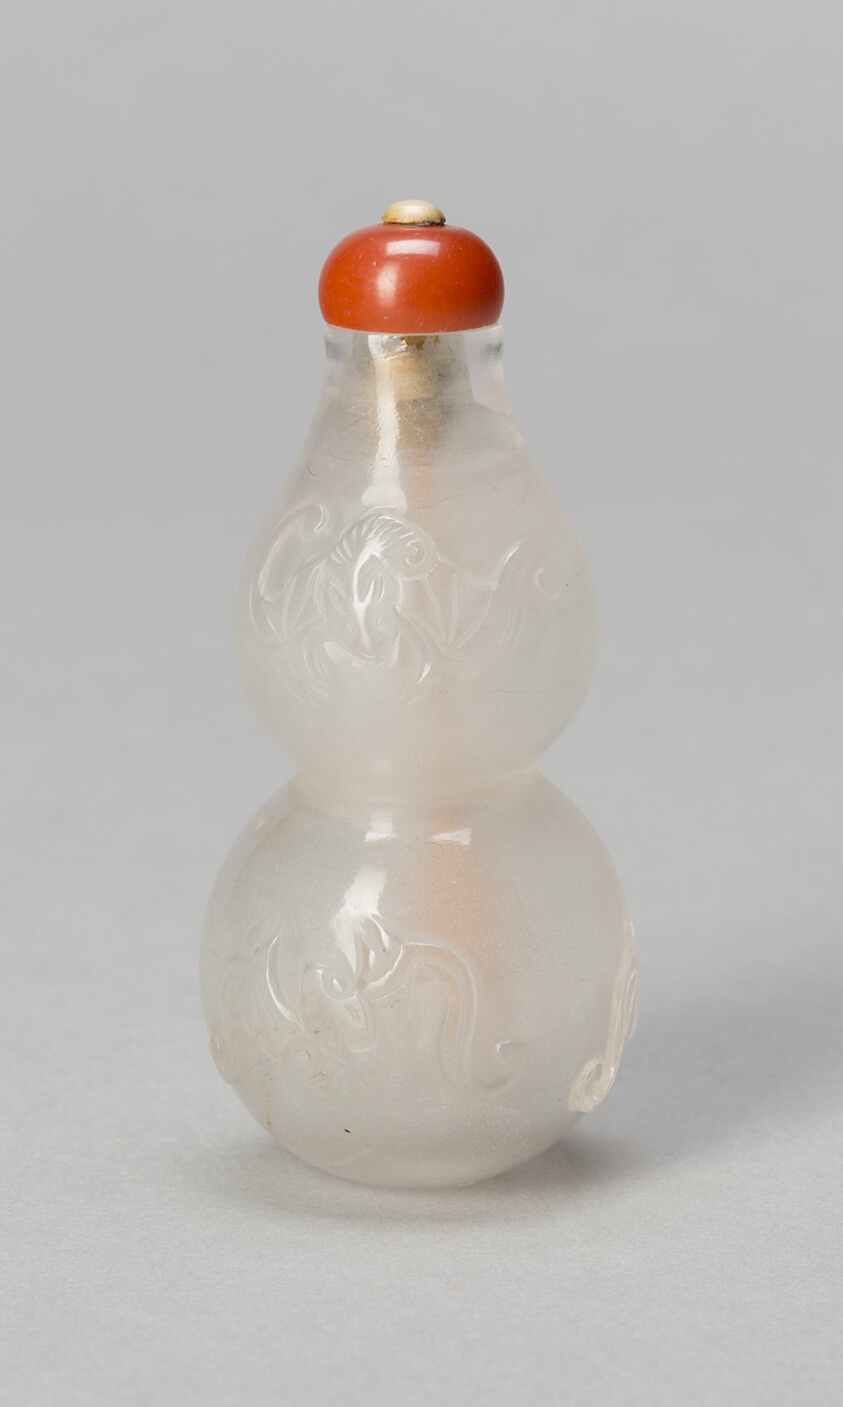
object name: Vessel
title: Gourd-Shaped Snuff Bottle with Bats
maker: China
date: Qing dynasty (1644–1911), 1800–1900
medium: Rock crystal with carved decoration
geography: China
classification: snuff bottle; asian art; vessel